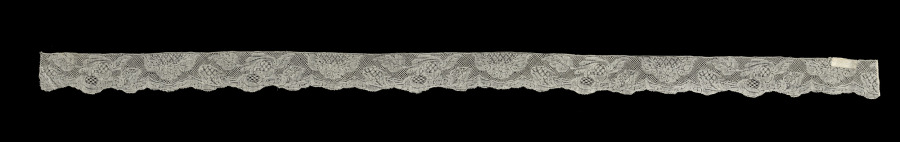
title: Lace Edging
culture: Belgium, Binche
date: 1740–60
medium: Bobbin lace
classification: Lace